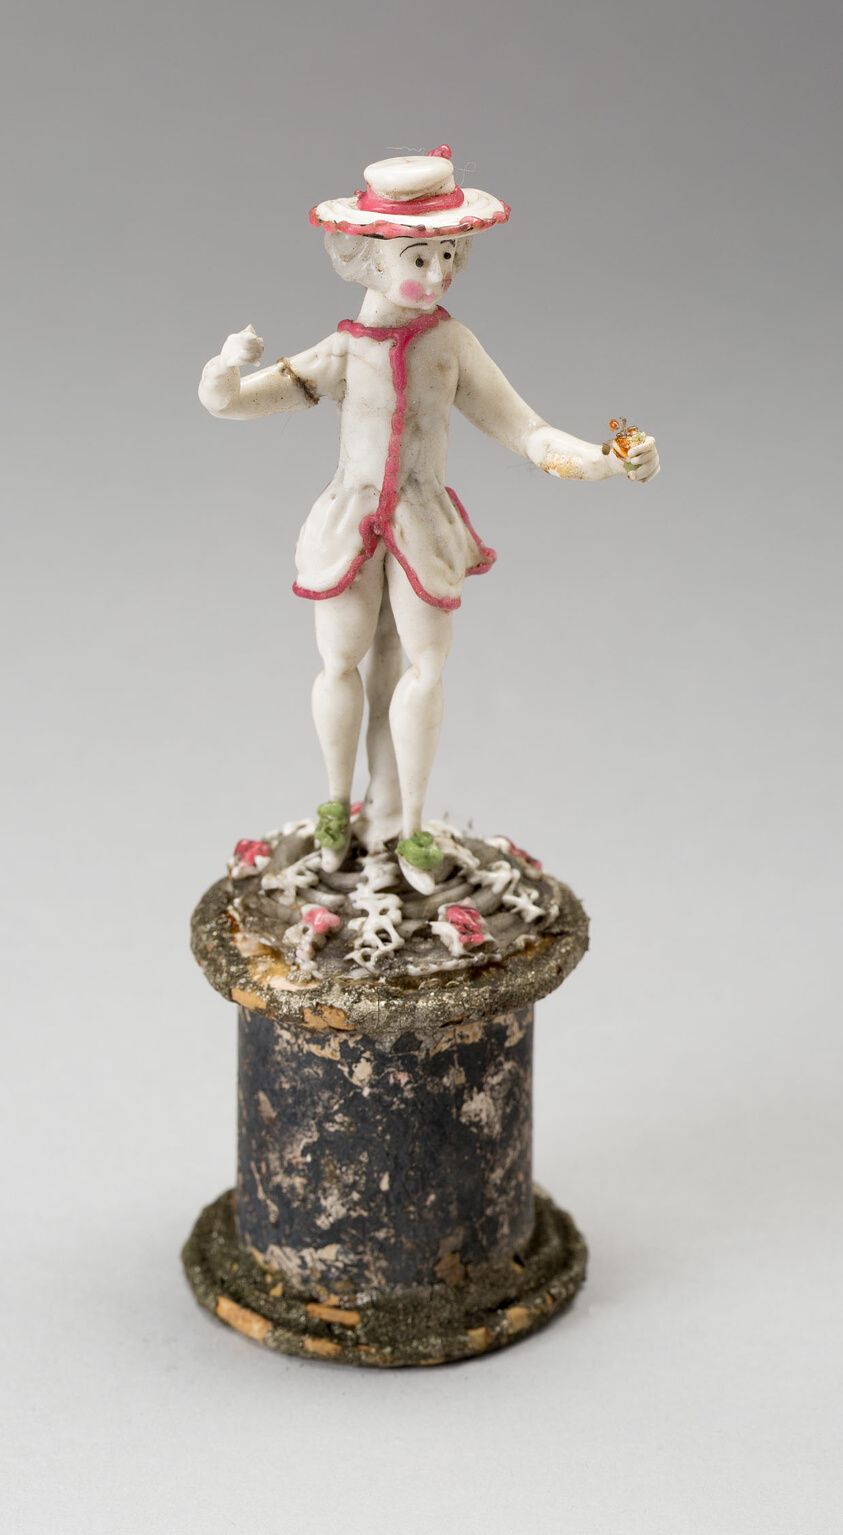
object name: Glass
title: Man Holding a Ball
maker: Nevers, France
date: 1750/99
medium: Glass; lampwork (verre de Nevers), metal armature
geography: France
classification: glass; miniature; decorative object/ornament; european decorative arts